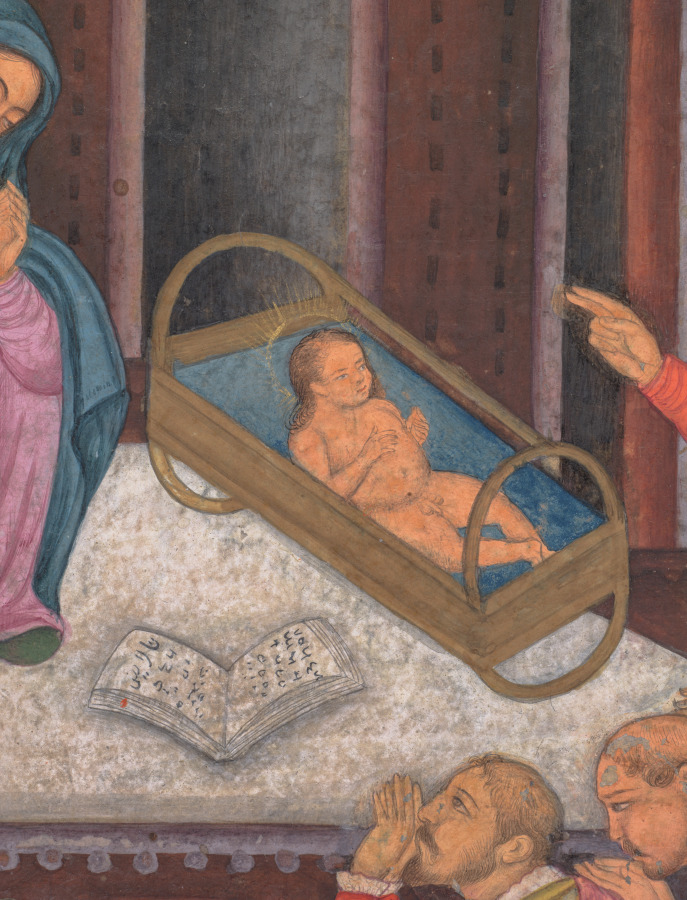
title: The Adoration of the Magi, from a Mirror of Holiness (Mir’at al-quds) of Father Jerome Xavier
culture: Northern India, Uttar Pradesh, Allahabad, Mughal period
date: 1602–4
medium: Gum tempera, ink, and gold on paper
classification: Manuscript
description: In this Nativity scene, familiar in Christian contexts, Mary and Joseph present the infant Jesus to the three Magi, who have placed their crowns on the ground in homage to the King of Kings. The three Magi are portrayed in Portuguese costumes to indicate to a Mughal audience that they are foreigners who believed in Christ. The artist cleverly and humorously indicates that the Magi have just arrived in Bethlehem by depicting their three camels in the bottom corner. One exhausted camel’s tongue hangs out the side of his mouth, while the other two animals lean eagerly toward a pair of water jugs.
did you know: The books next to newborn Jesus indicate that his birth fulfills a prophecy.